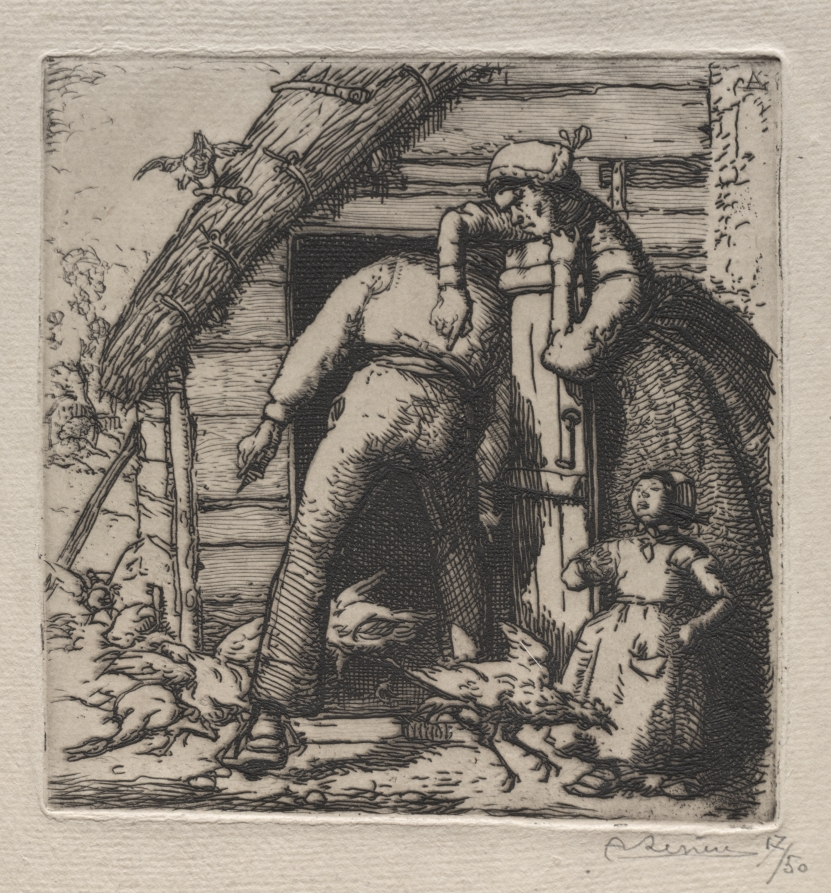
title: La Poulailler attrape la plus grosse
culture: France, 19th-20th century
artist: Auguste Louis Lepère (French, 1849–1918)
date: c. 1870–1918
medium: etching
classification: Print